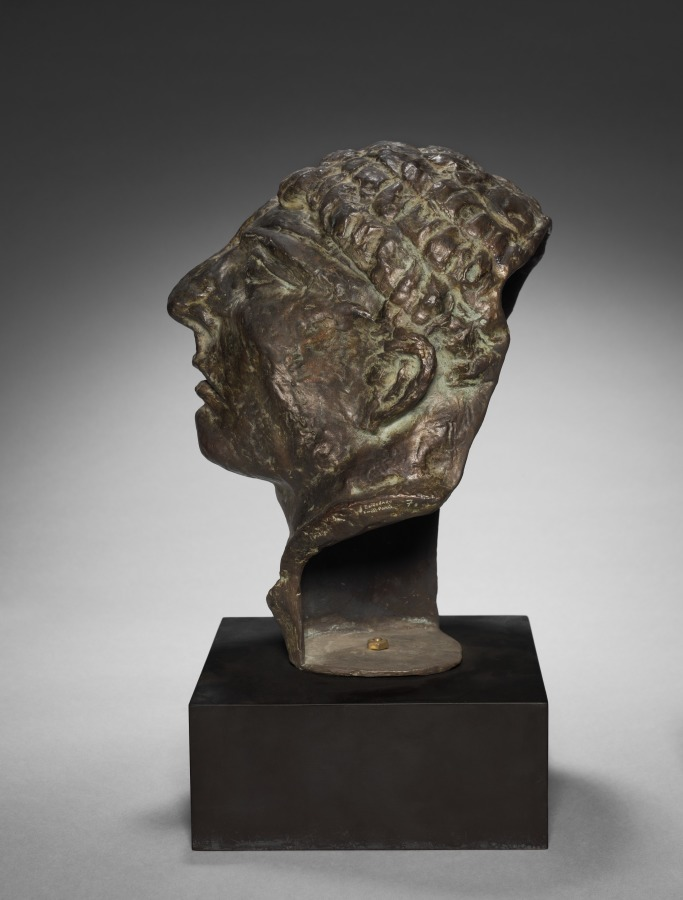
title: Mask of Hercules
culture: France, 20th century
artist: Emile Antoine Bourdelle (French, 1861–1929)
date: 1909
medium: bronze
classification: Sculpture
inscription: Inscribed at neck, lower left: "© Bourdelle"; beneath right ear: "E. Godard/Fondr Paris / 7"